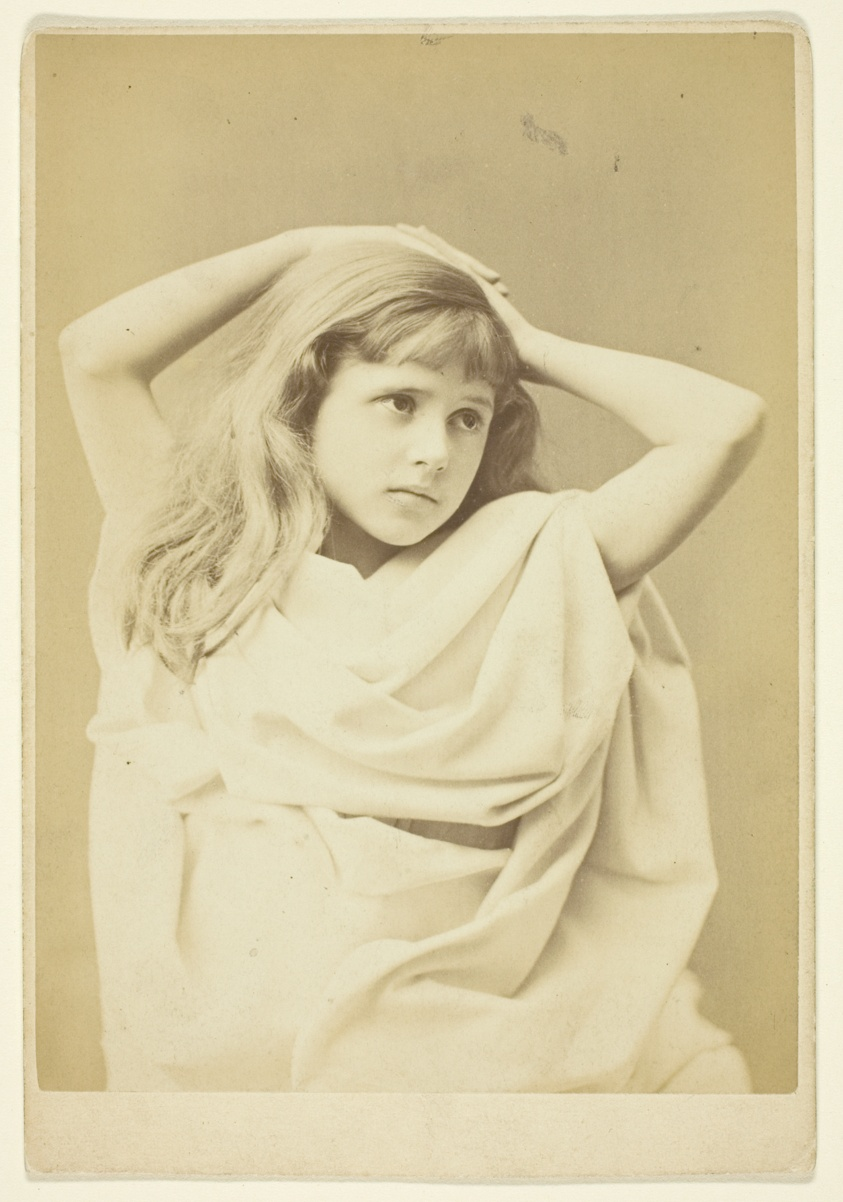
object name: Photograph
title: Portrait of Miss Constance MacDonald Gilchrist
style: 19th century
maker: Elliott & Fry (English, 1863–1919)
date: April 15, 1877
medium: Albumen print, cabinet card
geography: England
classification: carte-de-visite (albumen); albumen silver print; photographic process; photography; card photographs; photograph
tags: Collected by Hugh Edwards